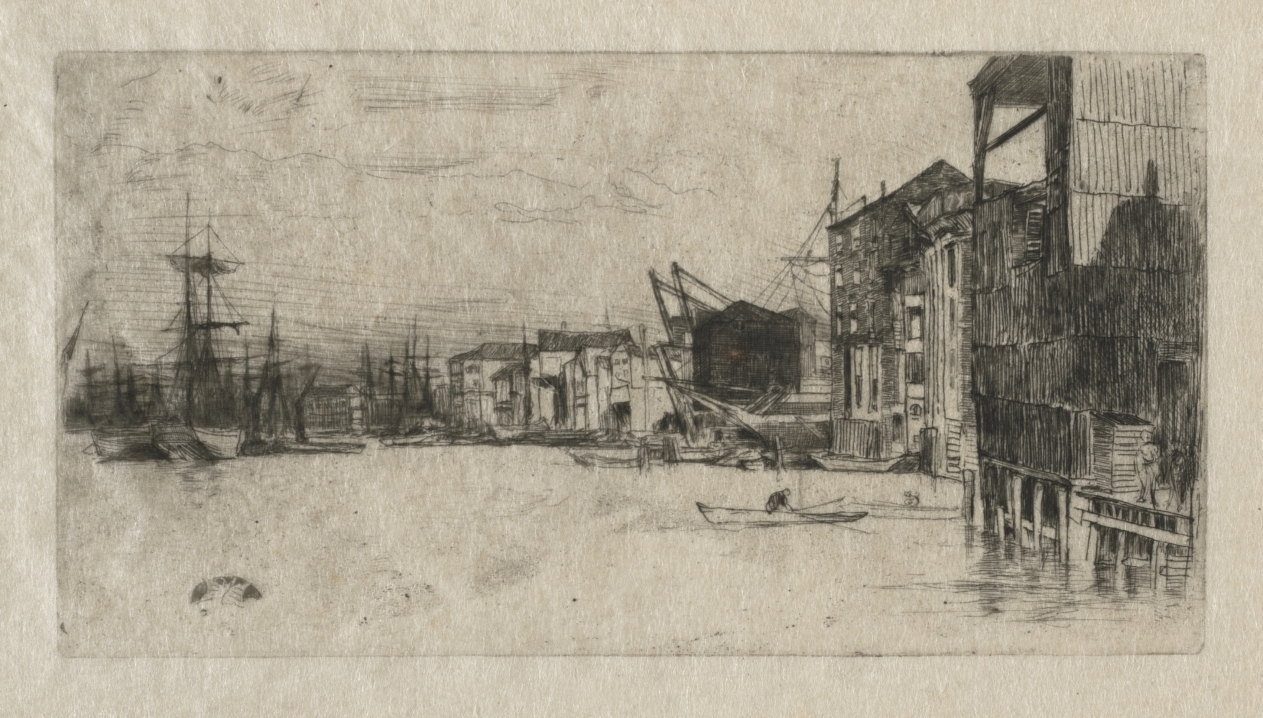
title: Free Trade Wharf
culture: America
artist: James McNeill Whistler (American, 1834–1903)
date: 1877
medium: etching and drypoint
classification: Print